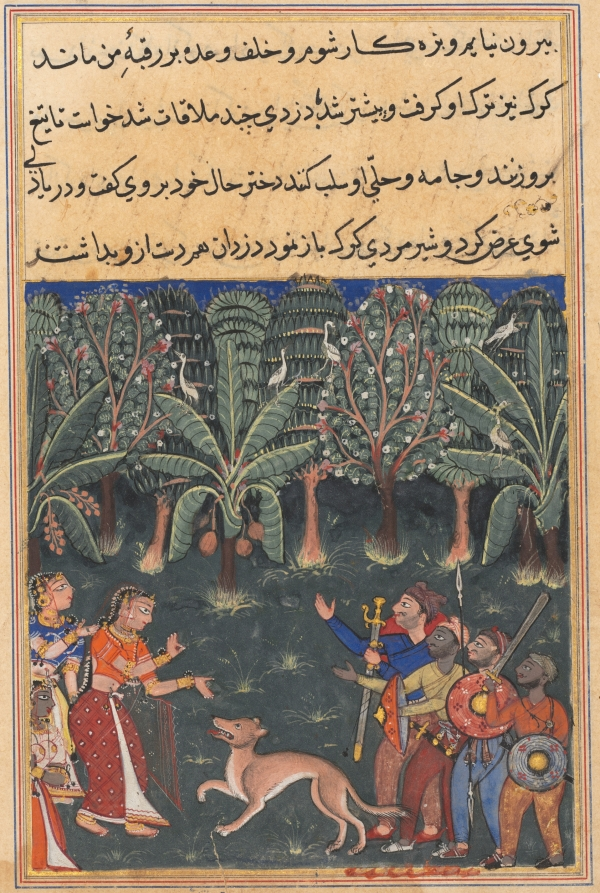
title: The merchant’s daughter encounters a wolf and bandits on her way to meet the gardener in order to keep her promise, from a Tuti-nama (Tales of a Parrot): Twelfth Night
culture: Mughal India, court of Akbar (reigned 1556–1605)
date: c. 1560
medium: gum tempera, ink, and gold on paper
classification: Painting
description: Persian books are read from right to left. One artist illustrated the three scenes from one of the 52 stories of the Tuti-nama, retaining many pre-Mughal traits. Trees stand out as bold shapes, and figures are arranged in a single register, or horizontal spatial band, and have angular and expressive gestures. The figures of the women are closely related to pre-Mughal types, shown always in profile and wearing garments that stand stiffly and sharply out before them. In leaves from the Tuti-nama, Mughal artists adapted the colors, compositions, and figure types of the earlier style.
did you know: The highly decorative way of painting trees did not continue into later Mughal painting traditions.